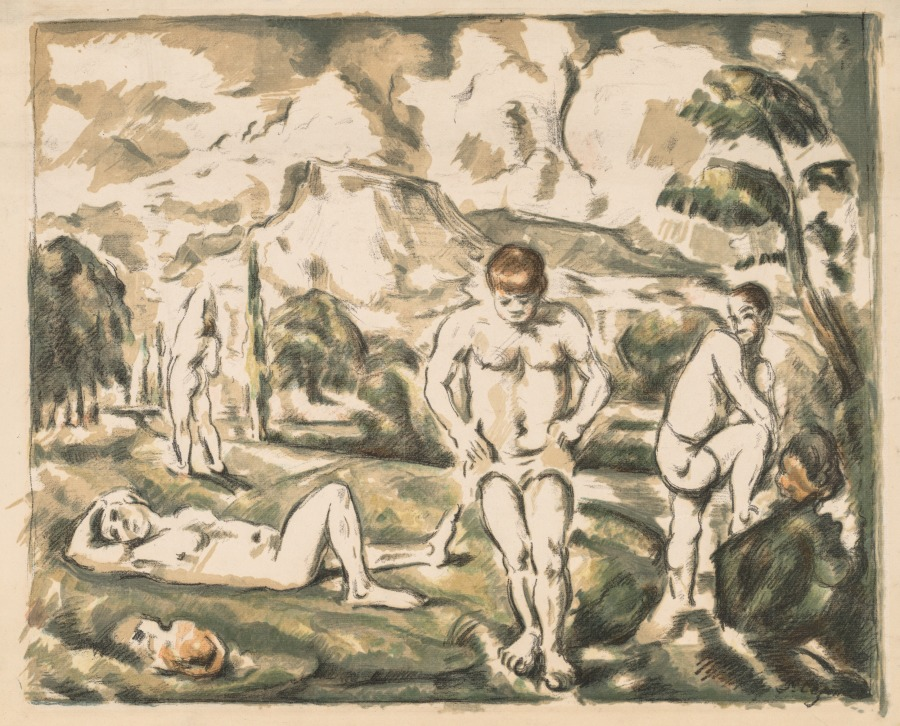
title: The Bathers (Large Plate)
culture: France, 19th century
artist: Paul Cezanne (French, 1839–1906)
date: 1896–97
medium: color lithograph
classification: Print